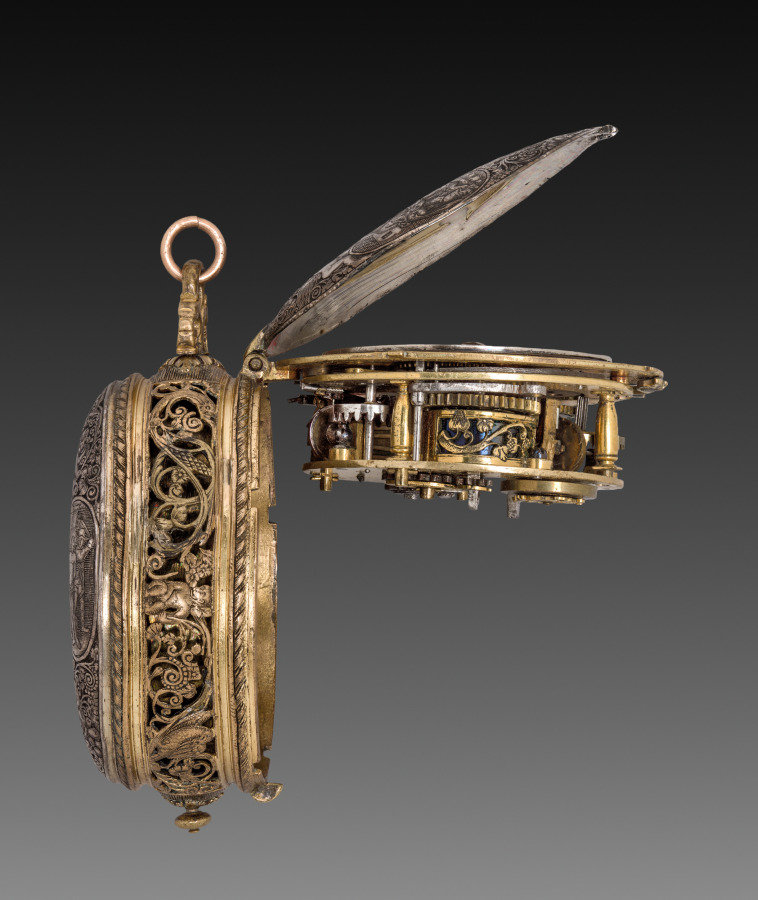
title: Engraved Egg Watch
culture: France, 16th century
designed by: Denis Martinot (French)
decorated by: attributed to Theodor de Bry (Flemish, 1528–1598)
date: 1590–1600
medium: silver, steel, and rock crystal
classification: Jewelry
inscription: inscribed: D. Martinot, Paris.